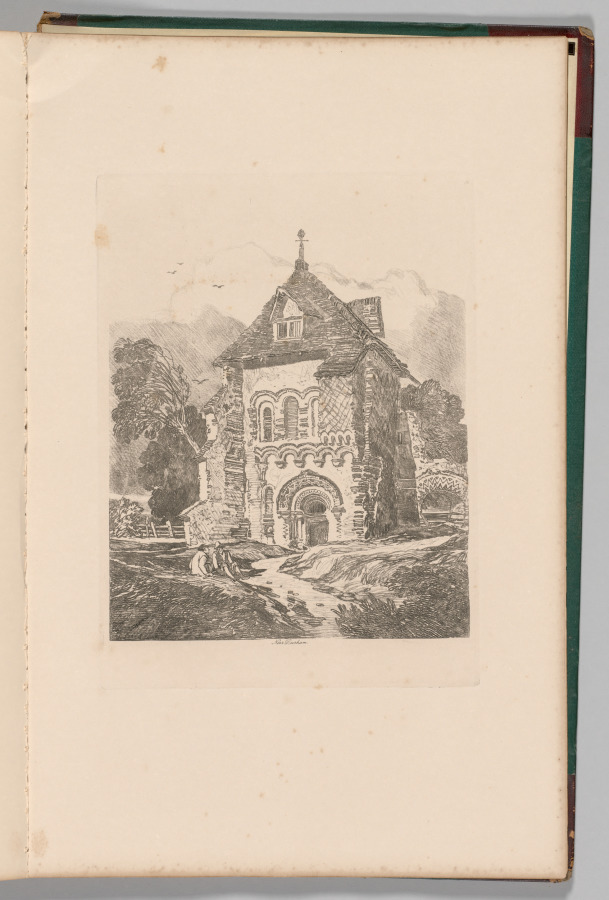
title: Liber Studiorum: Plate 36, Church near Durham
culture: England, 19th century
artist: John Sell Cotman (British, 1782–1842)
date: 1838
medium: softground etching, from a bound volume containing 48 plates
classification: Bound Volume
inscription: In plate, within image, upper right: 36; in plate, below image: Near Durham